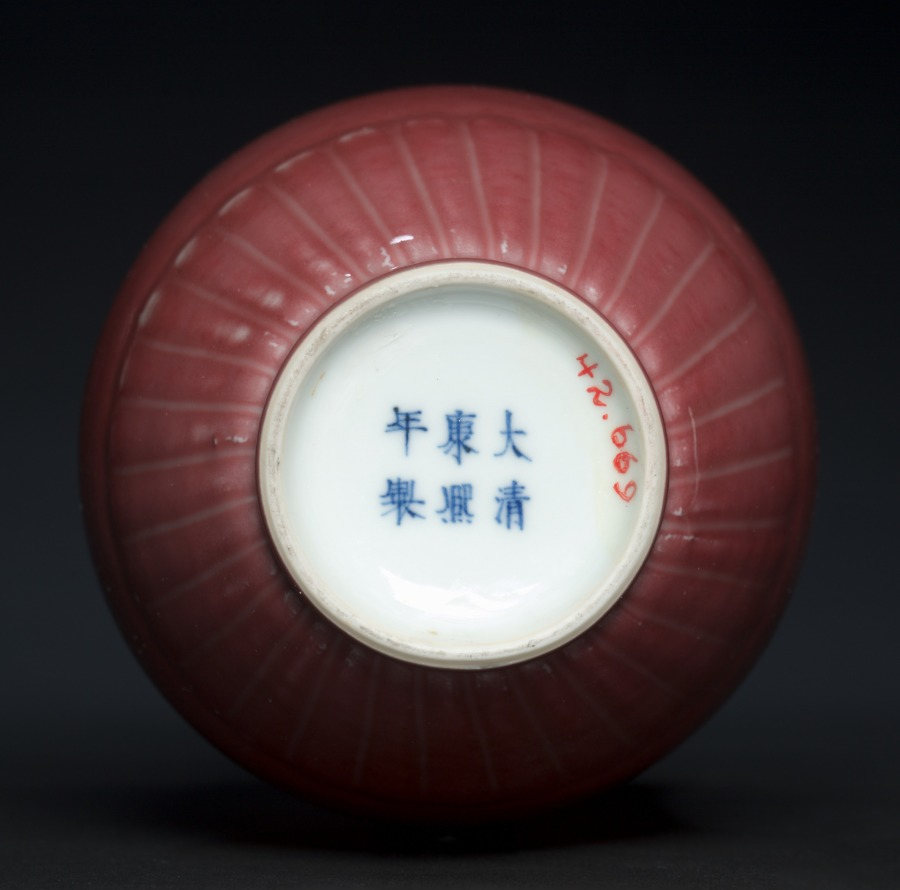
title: Lotus Petal Vase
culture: China, Jiangxi province, Jingdezhen, Qing dynasty (1644-1911), Kangxi period (1662-1722)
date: 1662–1722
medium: porcelain with "peach bloom" glaze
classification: Ceramic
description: The "peach-bloom" glaze developed during the Kangxi era has also been described as "drunken with beauty." Technical achievements were transcended with aesthetic associations, revealing the greatest sensitivity to all things beautiful in nature.